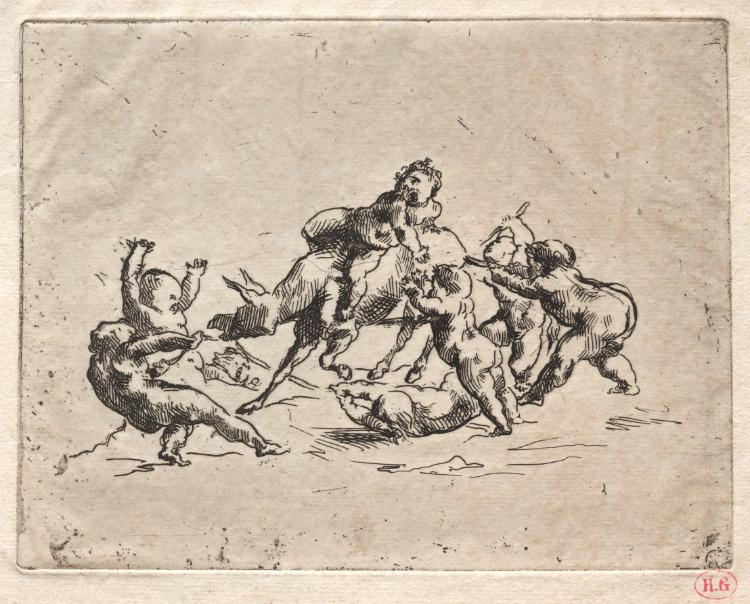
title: Bacchanal with Children and Donkey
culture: France, 19th century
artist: Jean-Baptiste Carpeaux (French, 1827–1875)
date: c. 1860–70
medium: etching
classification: Print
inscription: below the lower right platemark edge: stamp for Hector Giacomelli (Lugt 1311)